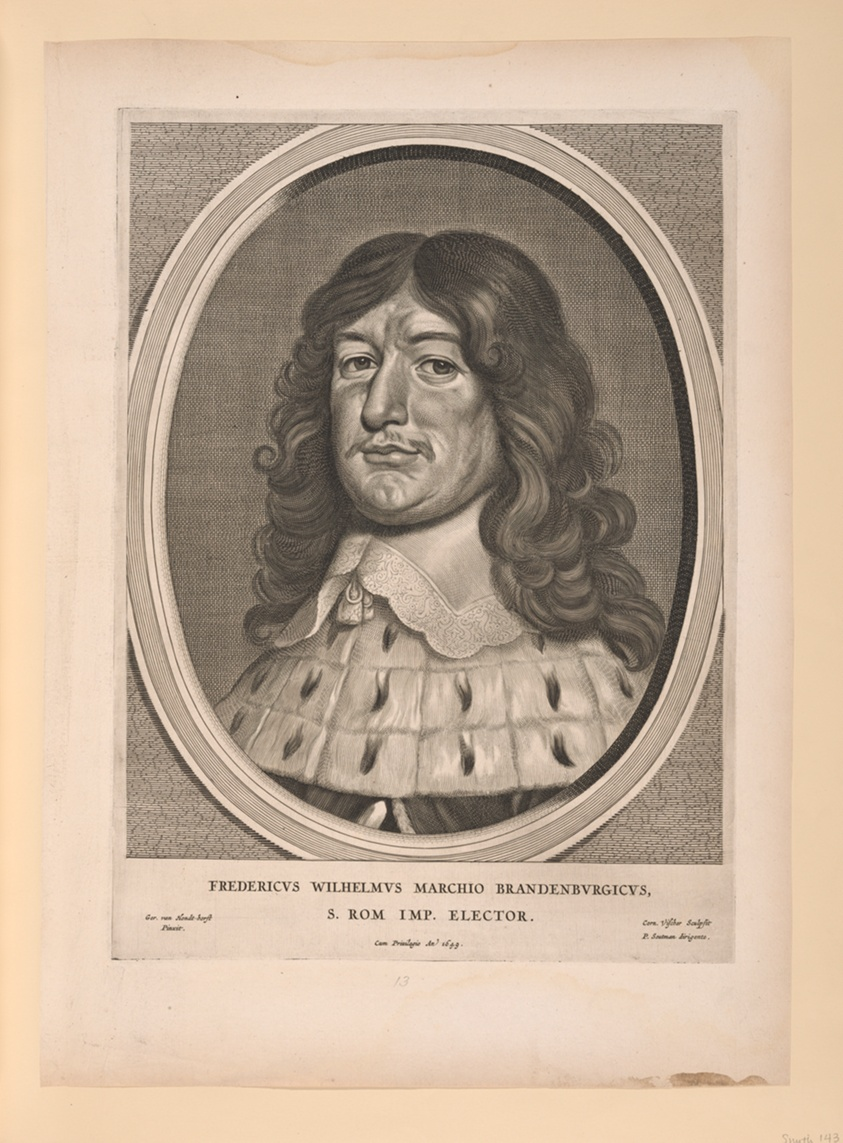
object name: Print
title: Frederick William, Elector of Brandenburg, from Nine Portraits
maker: Cornelis Visscher (Dutch, c. 1629-1658); after Gerrit van Honthorst (Dutch, 1592-1656)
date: 1649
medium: Engraving on paper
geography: Netherlands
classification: engraving; paper; print; prints and drawing